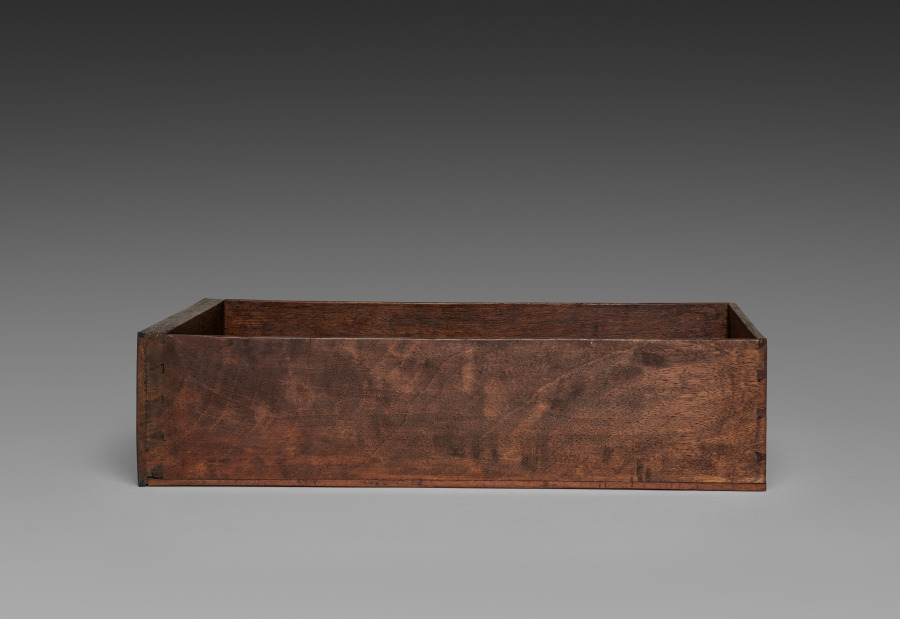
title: Interior Drawer for Cabinet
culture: France, late 17th Century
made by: André-Charles Boulle (French, 1642–1732)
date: c. 1690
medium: ebony, marquetry in metal and tortoise shell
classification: Furniture and woodwork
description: Appointed cabinetmaker to King Louis XIV in 1672, André-Charles Boulle became a master of furniture making in France during the late 1600s until his death in 1732. Known primarily for his use of marquetry, in which metal patterns are inlaid into tortoiseshell then applied within the veneered surface of the furniture, Boulle established a level of quality and craftsmanship few others could achieve. As a result, his work found favor at the royal court and among other aristocrats and diplomats eager to impress the king. The inclusion of a medallion depicting Louis XIV within the bronze decoration of this chest would have identified the owner with the royal court. Often exhibiting stout architectural proportions with elegant groups of inlaid motifs such as the parrot on the central panel of this chest, Boulle’s designs are an example of the intellectual fashion for contrasting ideas, materials, and motifs.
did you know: Originally designed to sit atop an elaborate tall stand, this chest was likely altered in the late 1700s to reduce its scale and height.